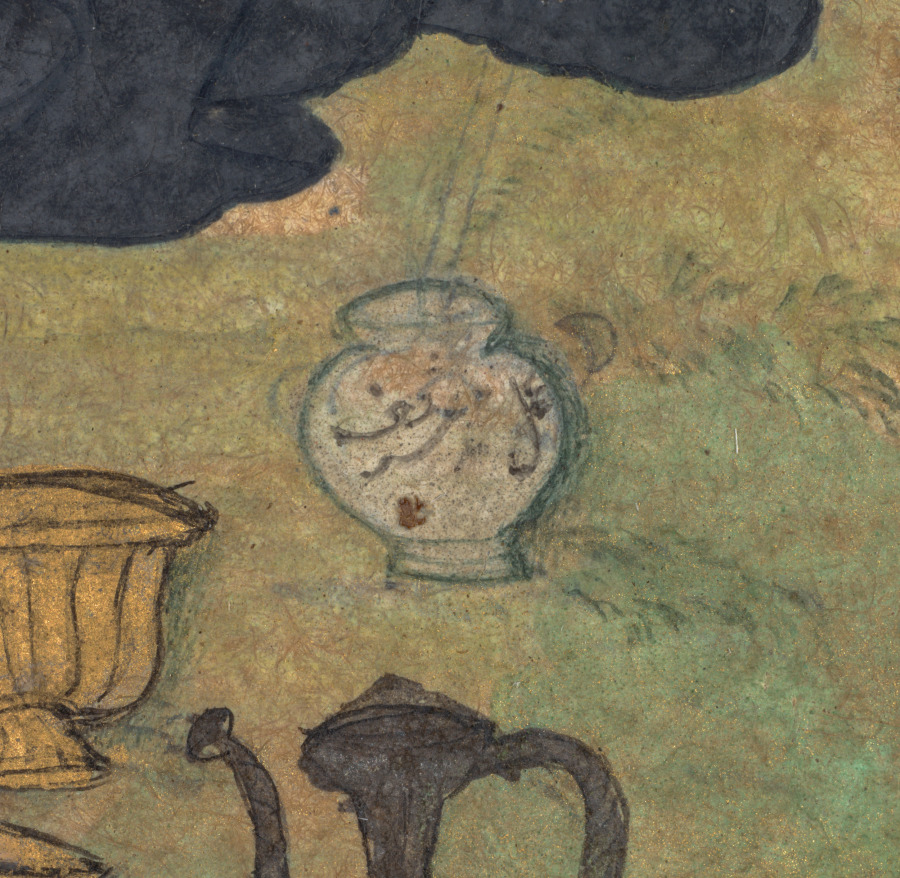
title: Angels bring food to Jesus in the wilderness (folio 55 recto), from a Mirror of Holiness (Mir’at al-quds) of Father Jerome Xavier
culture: Mughal India, Allahabad, made for Prince Salim (1569–1627)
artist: Muhammad Sharif (Indian, active c. 1600)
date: 1602–4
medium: Gum tempera, ink, color, and gold on paper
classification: Manuscript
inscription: Signature of the artist, Muhammad Sharif (Indian, active c. 1600), is written in the tiny pot by Jesus's foot.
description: To end his 40-day fast, five angels brought Jesus refreshments from heaven: breads, melons each with a knife for convenient cutting, fresh leeks, and what appear to be fragrant rice dishes and curries, along with cups of wine. Four of the angels are dressed in robes, and one is clothed only in feathers. After his baptism, Jesus spent 40 days and nights in the desert where he fasted, practiced spiritual exercises, and successfully resisted the temptations of Satan. Many of the rocks in this painting have faces, called grotesques. This page is the only surviving folio from this manuscript that has an artist’s signature, written in the tiny pot by Jesus’s foot.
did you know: The artist has put faces in the rocks, following a Persian convention.